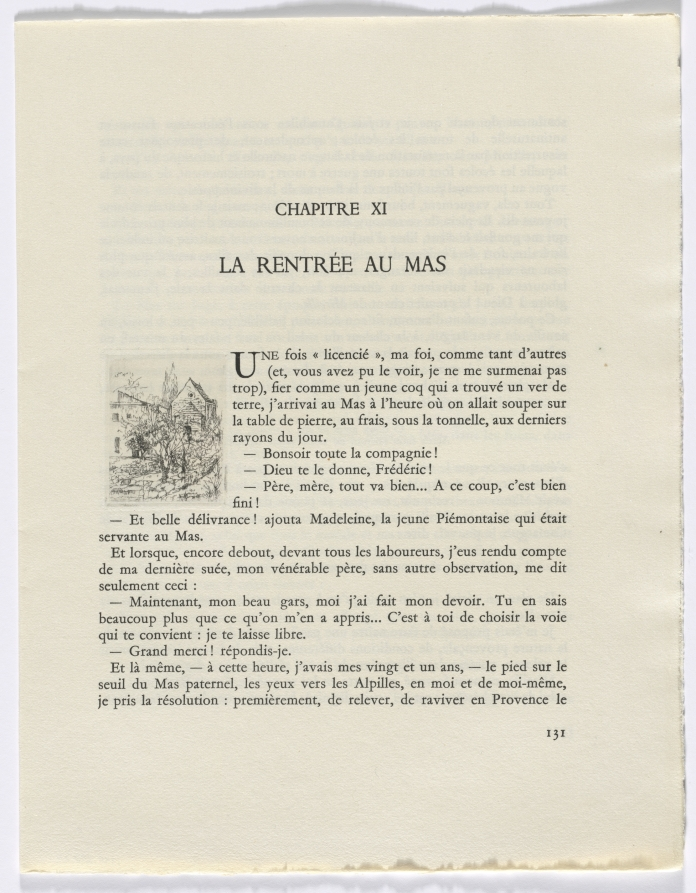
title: Frédéric Mistral: Mémoires et Recits by Frédéric Mistral: buildings and trees (page 131)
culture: France, 20th century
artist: Auguste Brouet (French, 1872–1941)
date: 1937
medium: etchings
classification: Portfolio